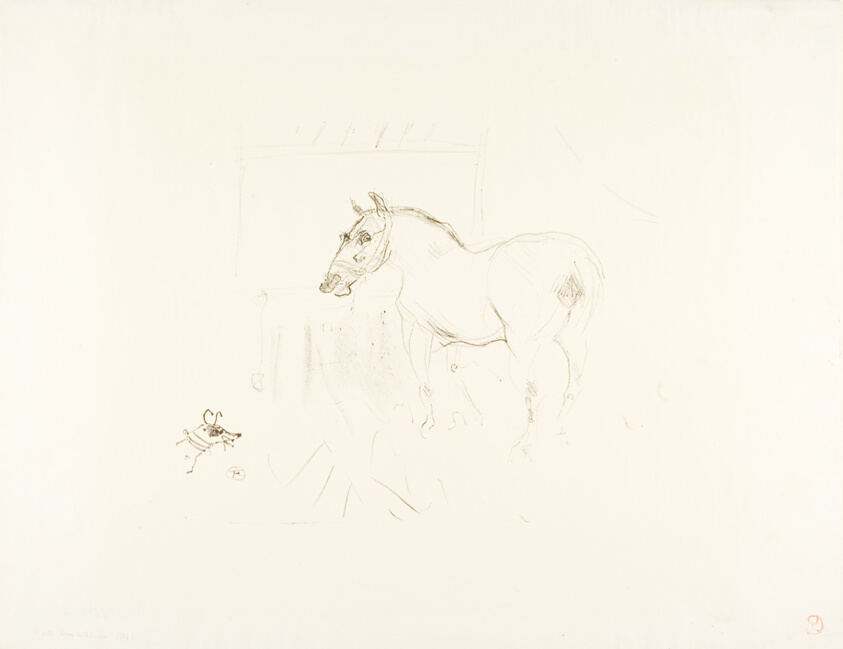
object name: Print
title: Calmèse's Little Pony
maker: Henri de Toulouse-Lautrec (French, 1864-1901)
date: 1898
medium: Lithograph on cream wove paper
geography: France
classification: lithograph; print; prints and drawing